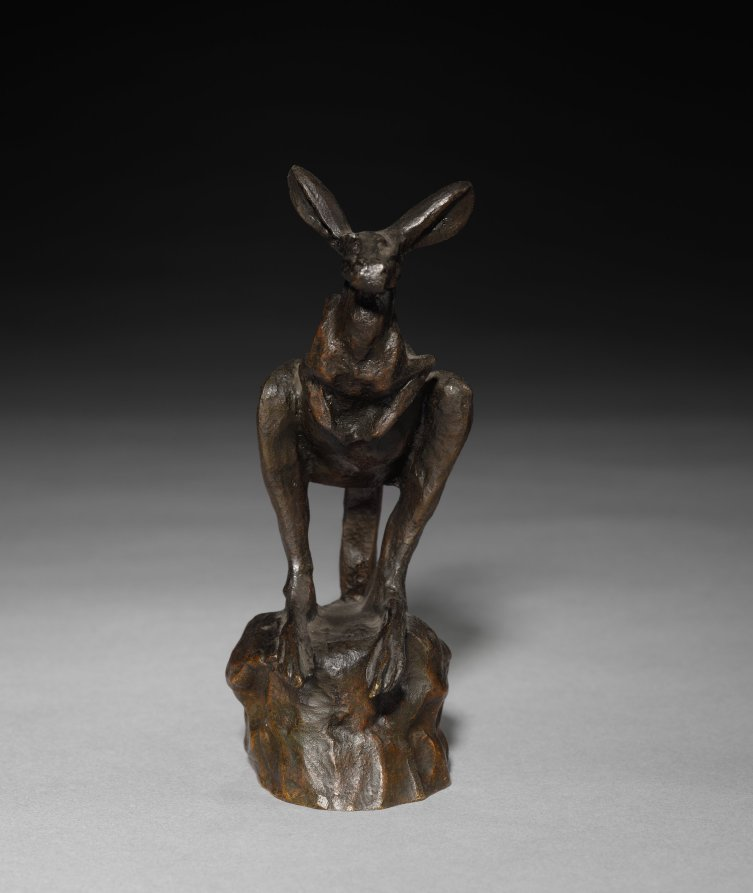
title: Kangaroo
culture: France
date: c. 1900–1925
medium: bronze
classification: Sculpture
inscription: Signed Nottot (?); ANDRO. FONDEUR, lower base